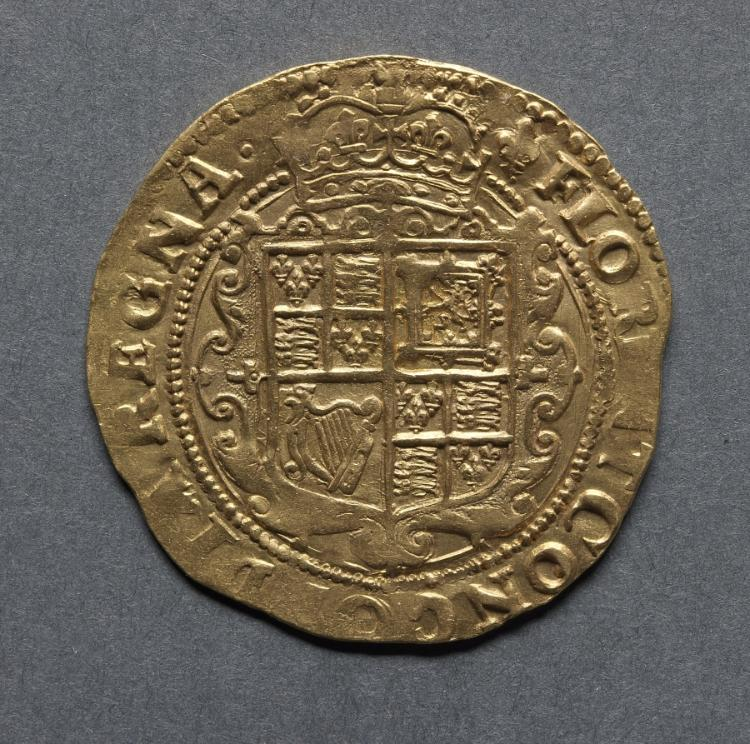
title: Unite: Crowned Shield (reverse)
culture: England, Charles I, 1625-1649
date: 1625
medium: gold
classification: Coins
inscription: FLORENT CONCORDIA REGNA